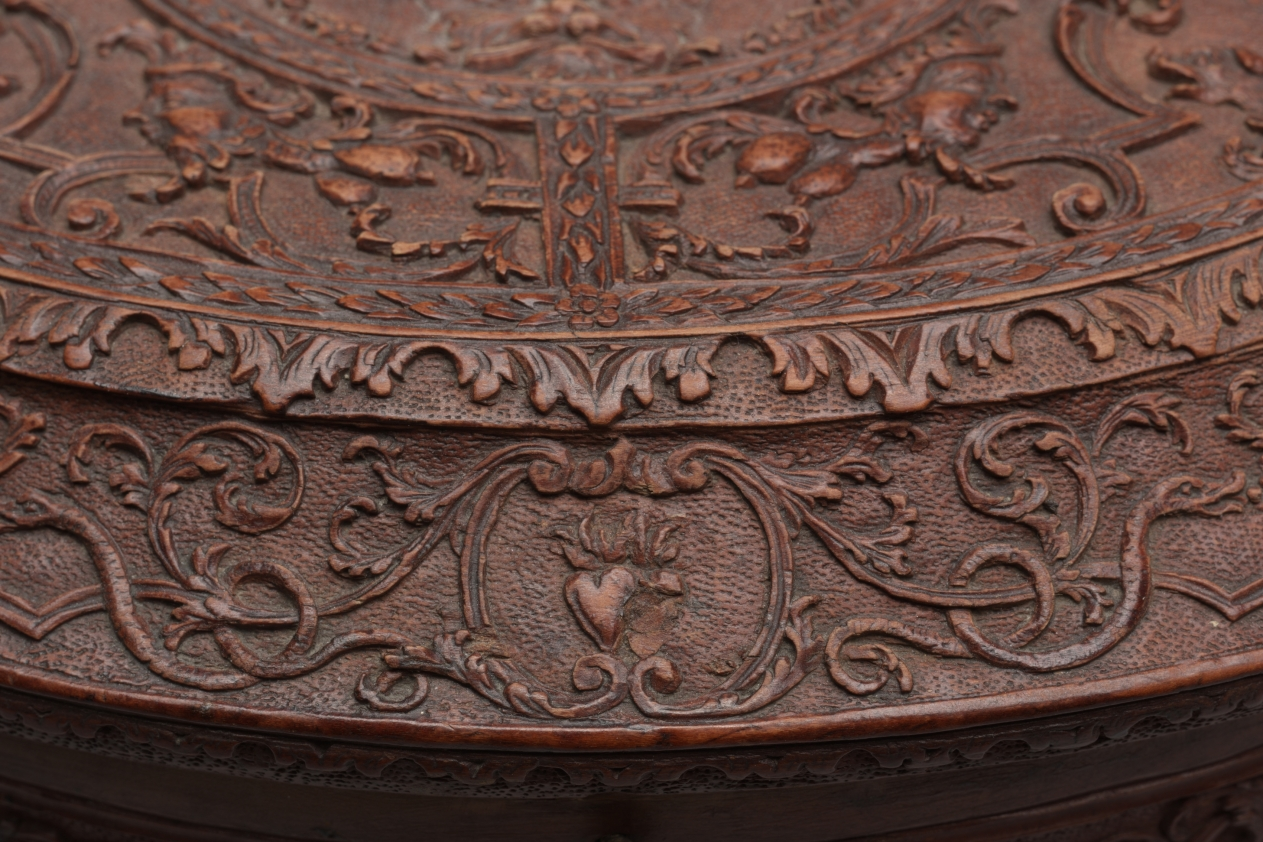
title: Box (1 of 2)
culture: France, Nancy, early 18th century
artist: Bagard (French)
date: early 1700s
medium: wood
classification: Furniture and woodwork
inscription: on top of box, initials crowned by coronet